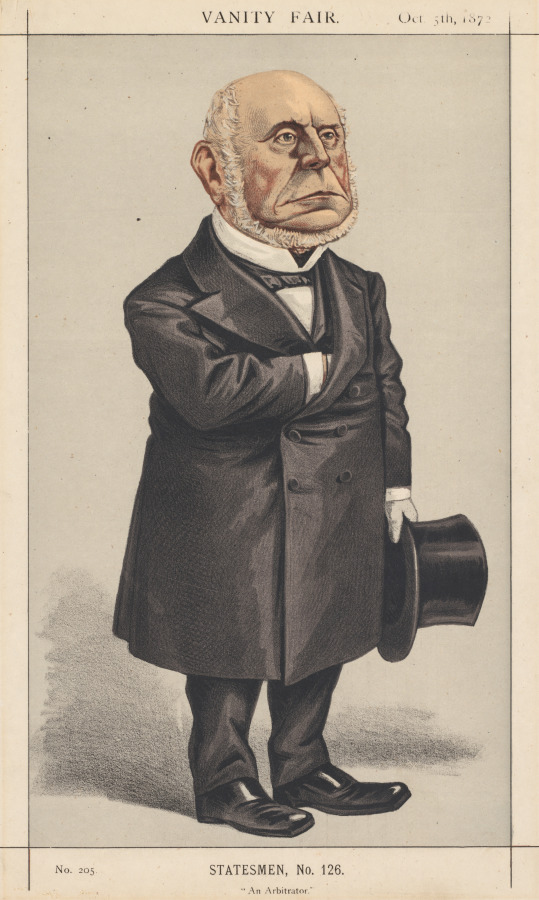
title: Vanity Fair: Statesman, No. 126 "An Arbitrator"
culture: England, 19th century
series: published in Vanity Fair Oct. 5, 1872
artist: Anonymous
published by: Vincent Brooks Day & Son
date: 1872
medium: color lithograph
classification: Print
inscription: On mat, in graphite: Charles Frances Adams. Ambassador to Britain during Civil War